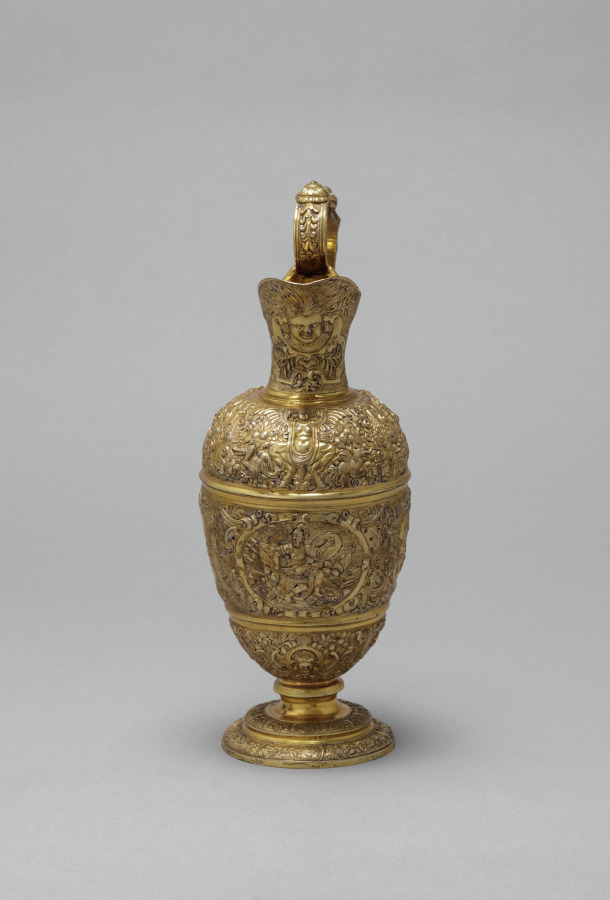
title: Ewer with Relief Scenes of Allegories of War, Peace, and Abundance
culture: France, 17th century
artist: workshop of Caspar Enderlein (German)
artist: copy after François Briot (French)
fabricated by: Hans Sigmund Geisser (German)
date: 1645–65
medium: silver gilt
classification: Silver